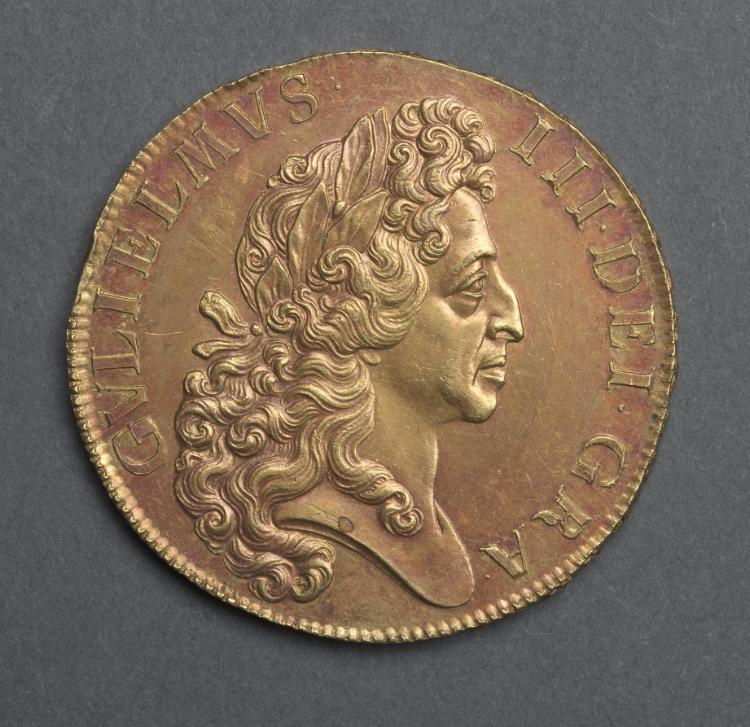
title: Five Guineas: William III (obverse)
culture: England, William III, 1694-1702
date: 1701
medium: gold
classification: Coins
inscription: GVLIELMVS . III . DEI . GRA.